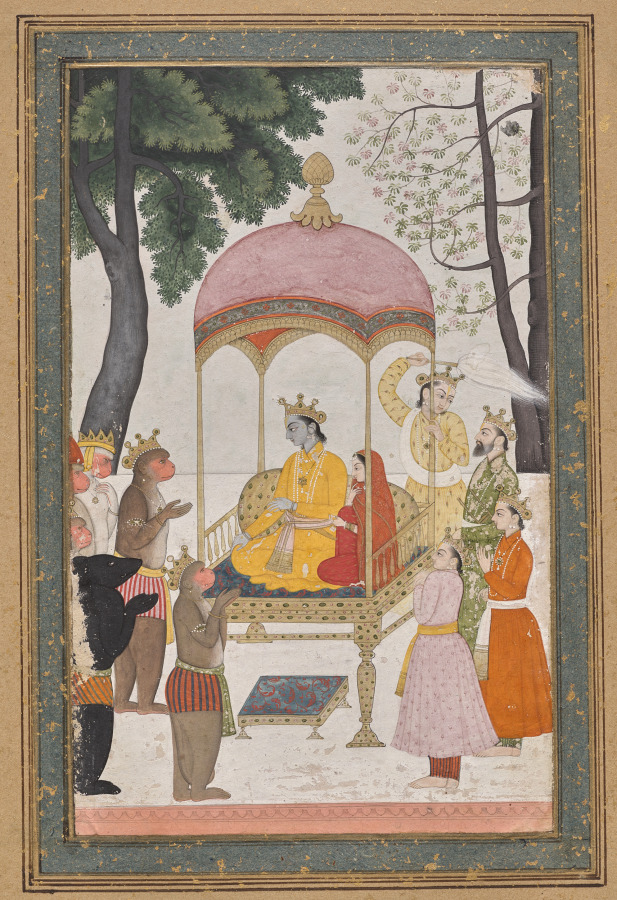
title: Enthroned Rama and Sita receive homage from their monkey and bear Allies, from the Yuddha Kanda (Book of the War) of a Ramayana (Rama’s Journey)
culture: Northern India, Pahari kingdoms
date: c. 1765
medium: gum tempera and gold on paper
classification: Painting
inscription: [[verso, upper center, in English, four lines]] Lord Rama + with his wife Sitā sitting his throne after coming back from (forest) + (forest) king monkey + (here) showing his (sumptuary)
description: This scene is set at the end of the Hindu epic Ramayana, after Rama returns from 14 years of exile in the forest. During Rama’s time of exile, Ravana abducted Rama’s wife Sita. Rama gathered an army of monkeys and bears, and rescued Sita. The chiefs of the monkey and bear armies pay their respects to the reunited royal couple.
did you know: Rama’s three brothers can be seen at the right side of the painting.